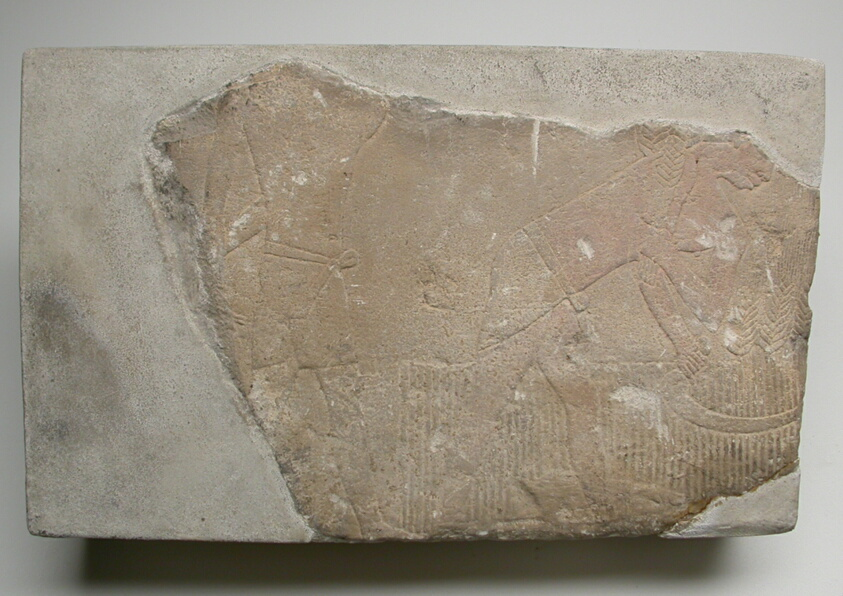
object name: Architectural fragment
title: Wall Fragment from a Tomb Depicting a Harvest Scene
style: tenth dynasty, first intermediate period, egyptian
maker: Egyptian, Saqqara ?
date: First Intermediate Period, Dynasties 9–10 (about 2060–2025 BCE)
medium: Limestone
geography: Egypt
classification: architectural fragment; stone; sculpture; ancient art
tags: agriculture